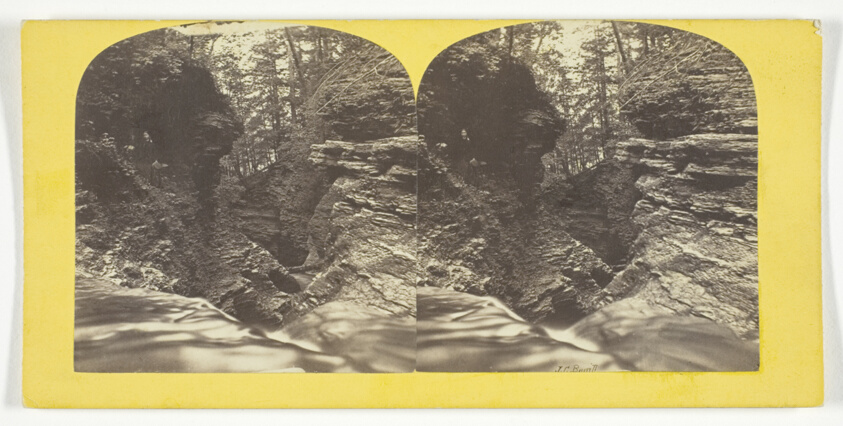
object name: Photograph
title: Buttermilk Creek Ithaca Cascades and 4t Fall looking down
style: 19th century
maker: J. C. Burritt; American, active 1860s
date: 1860/65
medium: Albumen print, stereo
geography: Ithaca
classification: photography; photograph; albumen silver print; stereograph (albumen)